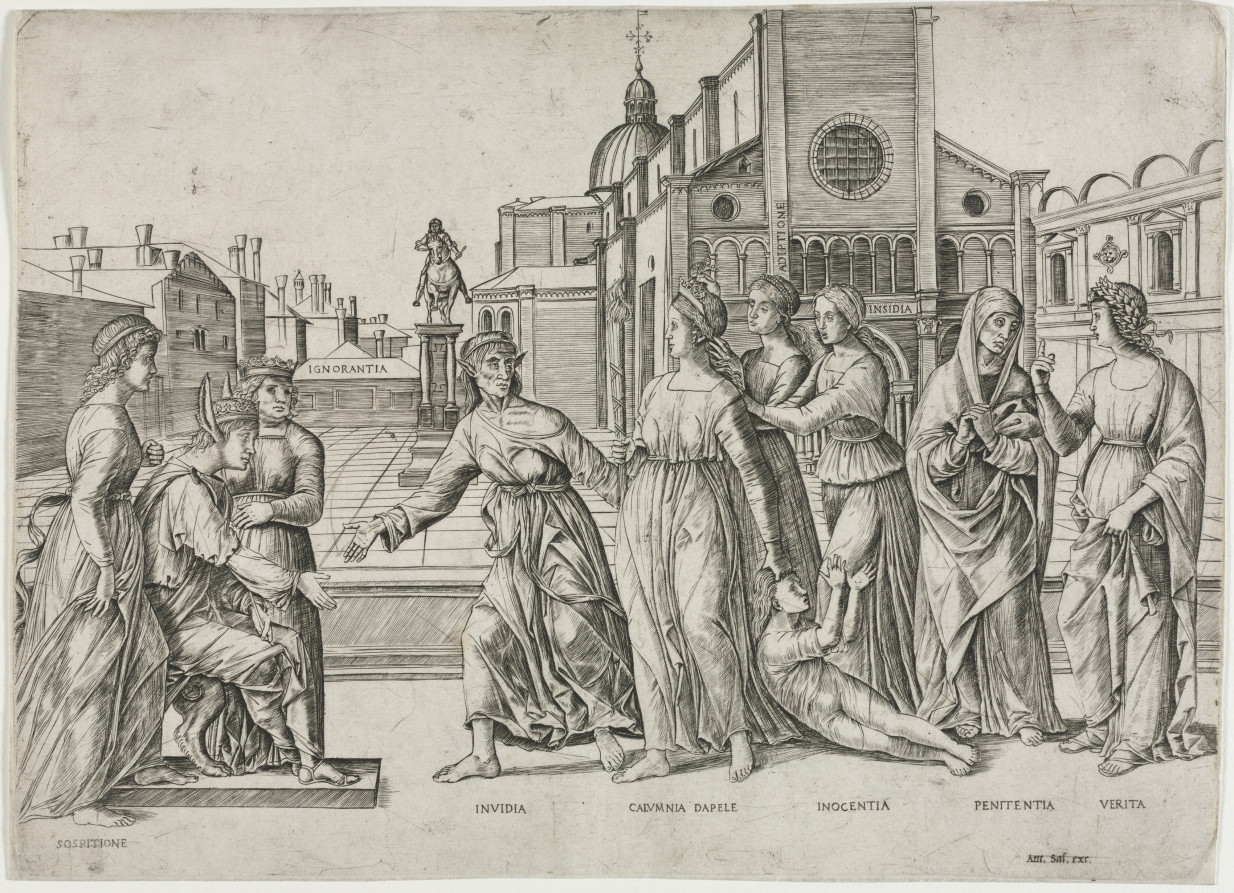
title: The Calumny of Apelles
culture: Italy, late 15th-early 16th Century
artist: Girolamo Mocetto (Italian, c. 1458-c. 1531)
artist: after Andrea Mantegna (Italian, about 1431–1506)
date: c. 1500–1506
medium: engraving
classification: Print